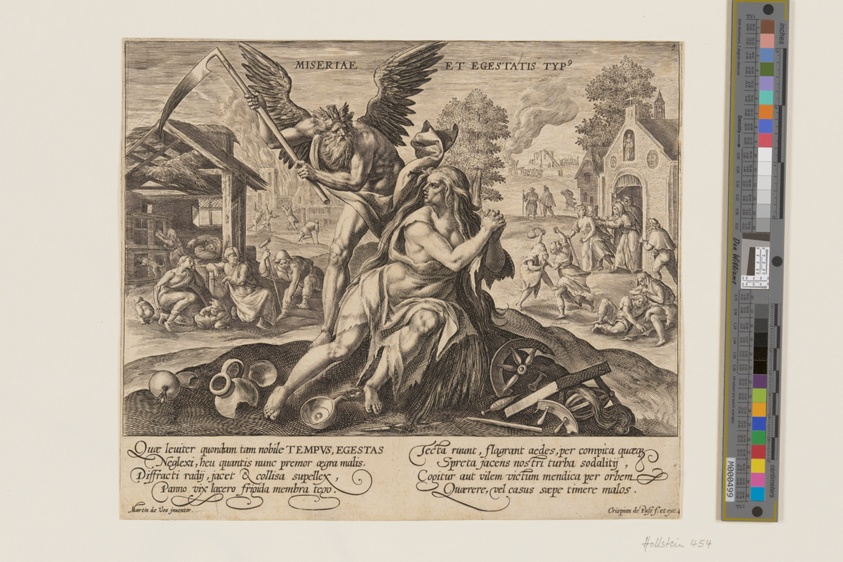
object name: Print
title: Miseriae est Egestatis Typus, from Time with Virtues and Vices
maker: Crispijn van de Passe I (Dutch, c. 1565–1637); after Maarten de Vos (Flemish, 1532–1603)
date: c. 1600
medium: Engraving on ivory laid paper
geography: Netherlands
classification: engraving; paper; print; prints and drawing